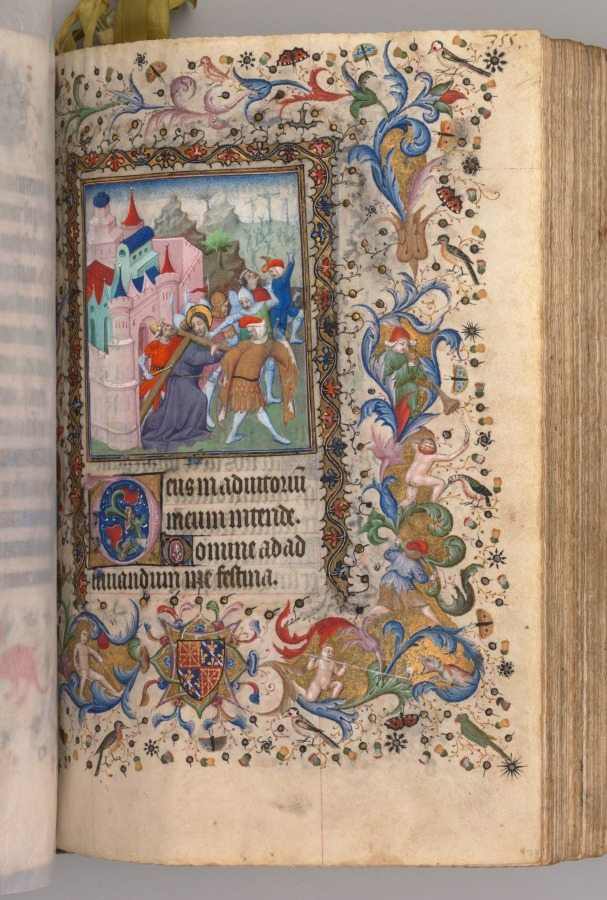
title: Hours of Charles the Noble, King of Navarre (1361-1425): fol. 170v, Christ Carrying the Cross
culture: France, Paris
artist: Master of the Brussels Initials and Associates (French)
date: c. 1405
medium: ink, tempera, and gold on vellum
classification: Bound Volume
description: This precious volume was obviously highly prized by its owner, the French-born King of Navarre, who had his coat of arms painted on no less than twenty folios. Rather than directly commissioning this manuscript from a specific workshop, it seems that Charles the Noble acquired his book of hours -- perhaps ready-made for the luxury market -- while on a trip to Paris in 1404-05. A collaborative effort, six painting styles are evidenced within the pages of this codex, those of two Italians, two Frenchmen, and two Netherlanders. The painter who was responsible for the planning and decoration of the book, and who produced seventeen of the large miniatures, was a Bolognese artist known as the Master of the Brussels Initials. His principal assistant, responsible for most of the borders, was a Florentine who signed his name "Zecho" da Firenze on folio 208 verso.